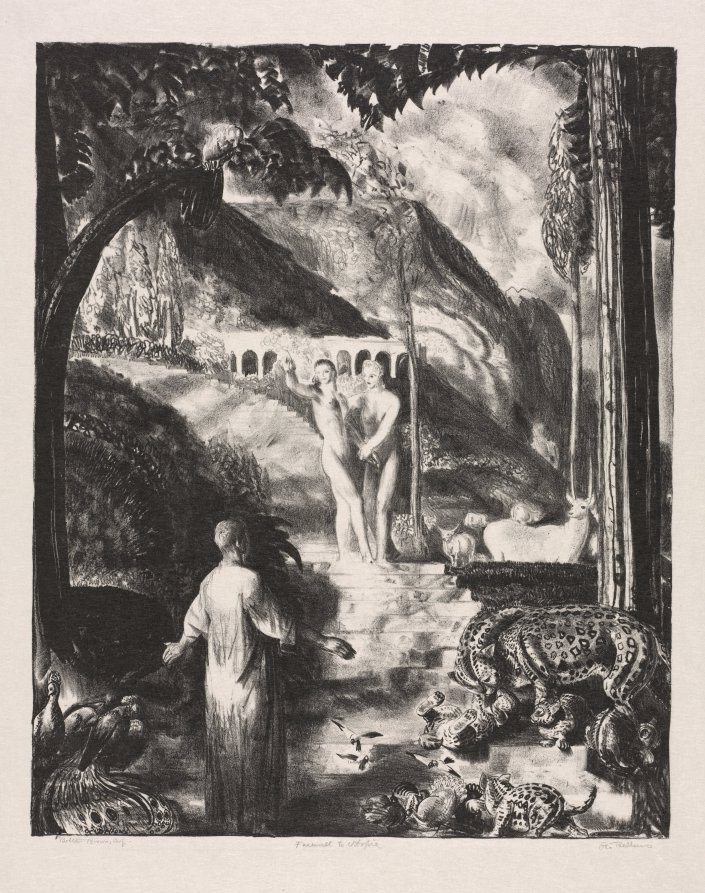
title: Farewell to Utopia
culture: America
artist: George Bellows (American, 1882–1925)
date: 1923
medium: lithograph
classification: Print